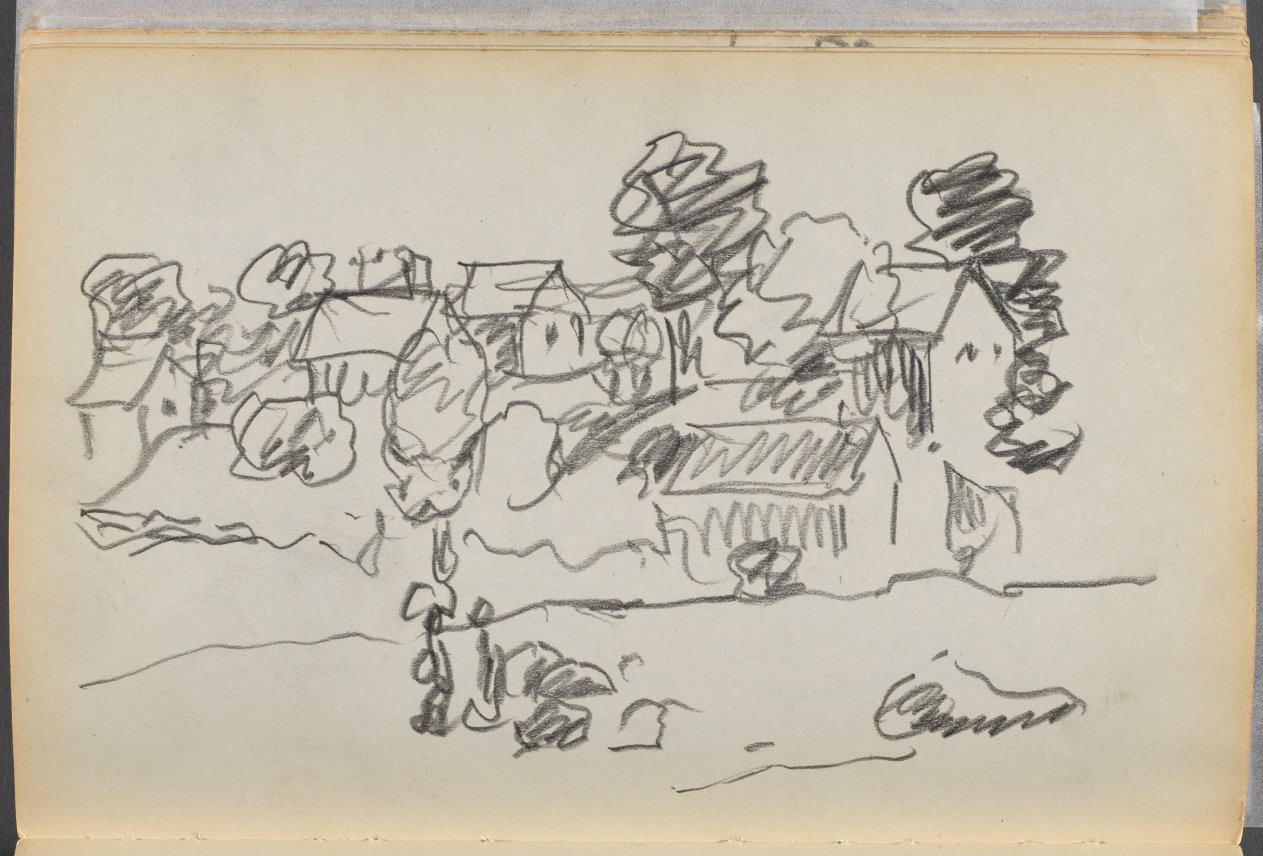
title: Sketchbook- The Granite Shore Hotel, Rockport, page 168: Houses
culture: America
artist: Maurice Prendergast (American, born Newfoundland [now Canada], 1858–1924)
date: 1905–10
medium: graphite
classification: Bound Volume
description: This sketchbook contains 72 pages of pencil drawings and 9 watercolors of Cape Ann. On the inside of the cover Prendergast wrote the address of the Granite Shore Hotel in Rockport, Massachusetts.